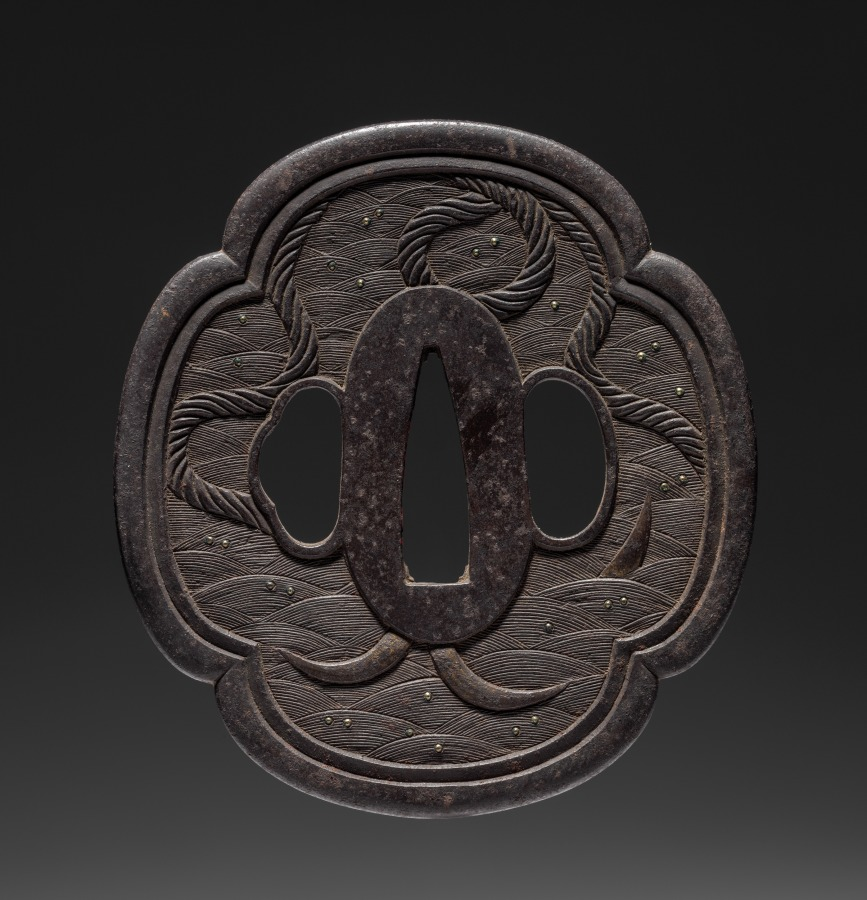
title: Sword Guard (Tsuba) with Anchor in Waves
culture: Japan, possibly Edo period (1615-1868)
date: c. 1615–1868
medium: iron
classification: Arms and Armor